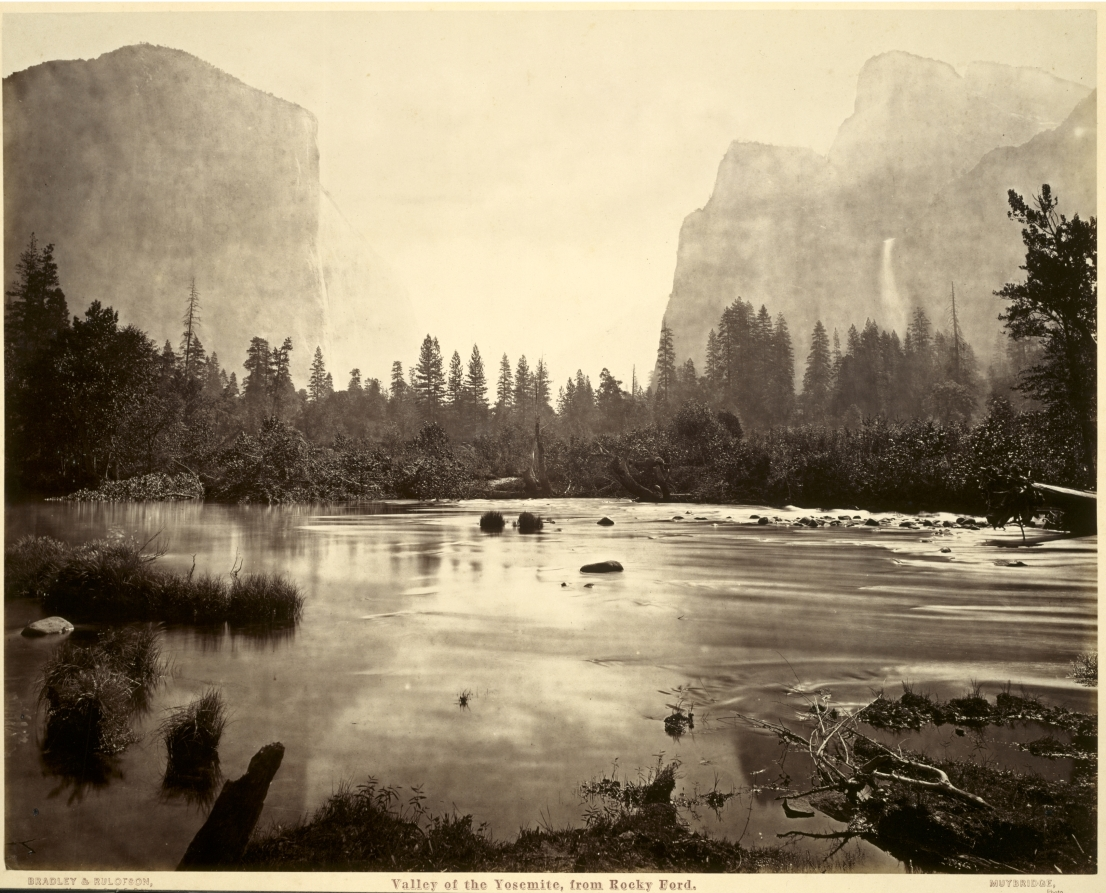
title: Valley of the Yosemite, from Rocky Ford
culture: America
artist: Eadweard J. Muybridge (American, 1830–1904)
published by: Bradley & Rulofson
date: 1872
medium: albumen print from wet collodion negative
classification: Photograph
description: Early in a long, creative career distinguished by landmark studies of animal and human motion, Eadweard J. Muybridge created a remarkable group of photographs of Yosemite Valley in California. During his second journey there, lasting from June through November 1872, he made his most significant and extensive body of landscape photographs, many taken with mammoth glass plate negatives measuring 20 x 24 inches. This image of the valley from Rocky Ford is one of his most luminous and sublime views. Taken in early morning light, this carefully framed and dramatically lit photograph reveals Muybridge's interest in atmospheric conditions, shimmering reflections, and the movement of water.